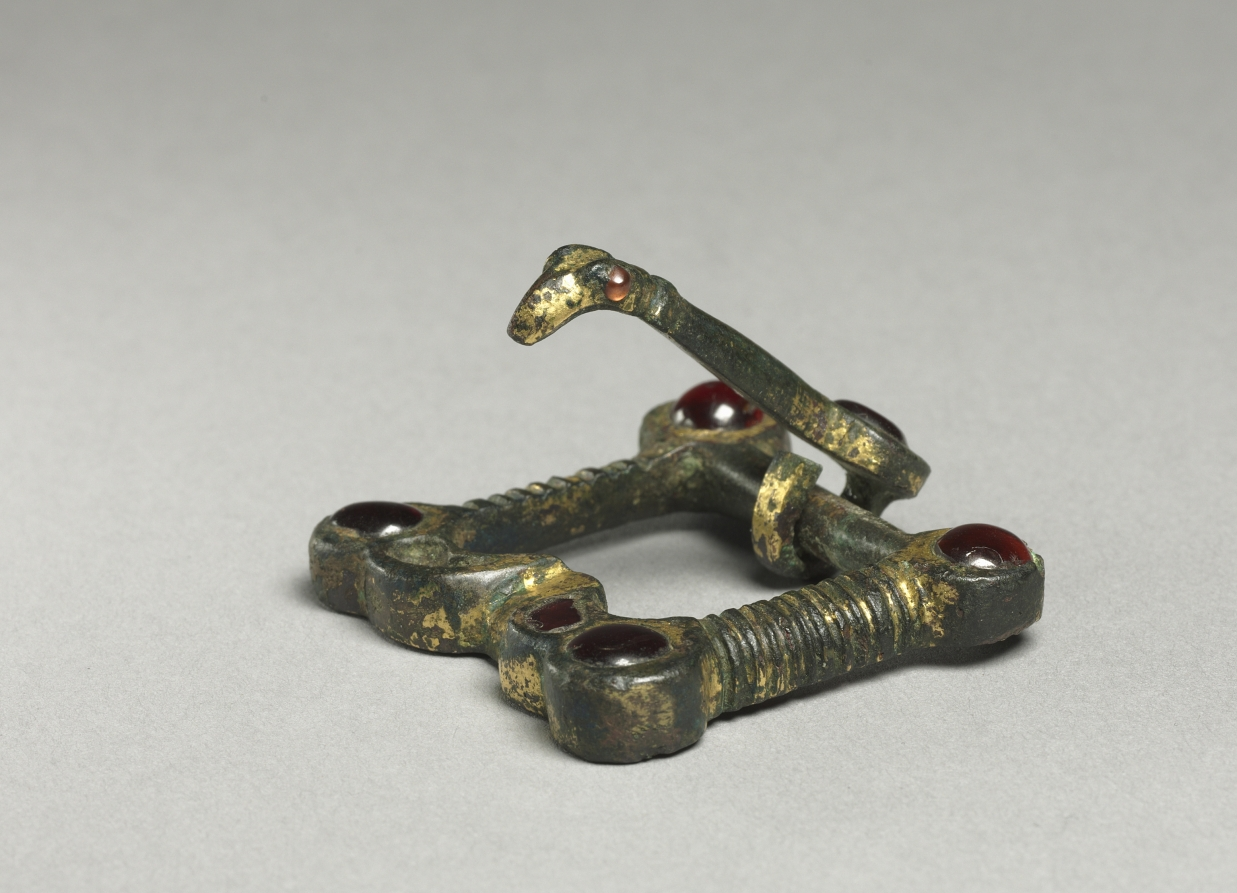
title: Buckle with Animal-Shaped Thorn and Belt Plate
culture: Sarmato-Gothic, Migration period, 5th century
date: 400s CE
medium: bronze with traces of gilding and garnets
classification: Jewelry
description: Between the AD 200s and the 600s, the European West is characterized by the so-called "barbarian invasions," a term referring to the movement of various Germanic people into the Roman Empire. The period of the great migrations of these Germanic peoples was one of uncertainty and disorder. By the AD 300s, the collapse of Roman military power in the western provinces was increased by the westward movement of the Huns, an especially fierce enemy from the east. The Huns drove before them displaced Germanic tribes—the Visigoths, Ostrogoths, and Lombards—as they advanced deep into the western provinces. These Germanic peoples were composed of many national groups with diverse customs and traditions. Long nomadic, they gradually settled and took to farming, though always preferring maritime commerce and fishing. They were not attracted to the monumental arts of architecture and sculpture until they had long settled an area. By contrast, the tombs of these migratory people were filled with weapons, tools, and jewelry, often magnificently decorated. The art of the Germanic peoples is almost exclusively one of personal adornment—a portable art that followed men and women to their graves.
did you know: During this time it was popular to wear gold inlaid with precious stones.